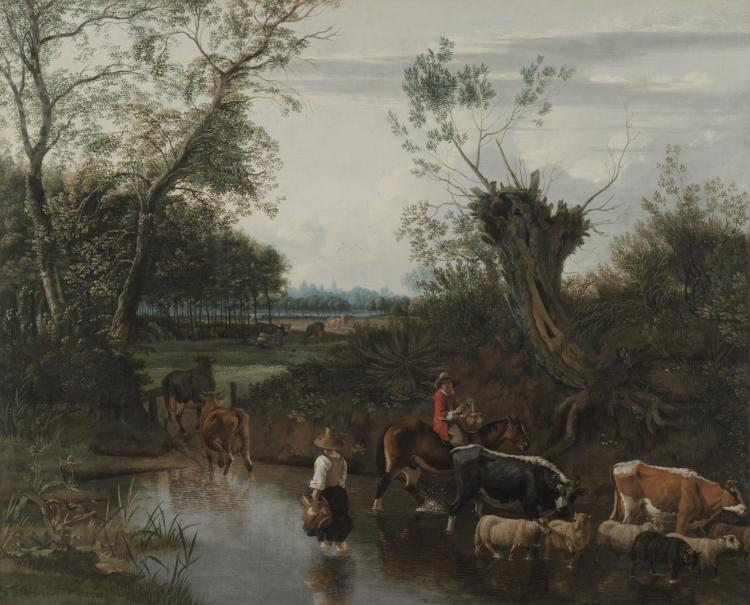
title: Peasants Crossing a Stream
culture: Flanders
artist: Jan Siberechts (Flemish, 1627-c. 1703)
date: c. 1670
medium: oil on canvas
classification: Painting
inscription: Signed lower left: "J. sibrechts. A. anvers."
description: The painting is characteristic of Jan Siberechts's Antwerp style, characterized by scenes with fords through which peasants wade with their cattle. The peasants wear simple but brightly colored attire and stand out against the cool green landscape. Flanked by overgrown foliage, the silver hues of the still stream shimmer with reflections. Over the course of his career, which included moving to London in 1672, Siberechts continued to use many of the same figures in his paintings, including Flemish peasant women carrying jugs, like the one seen in this painting. Likewise, his approaches to depicting animals, such as the cows seen here, changed very little over time and are ubiquitous throughout his oeuvre.